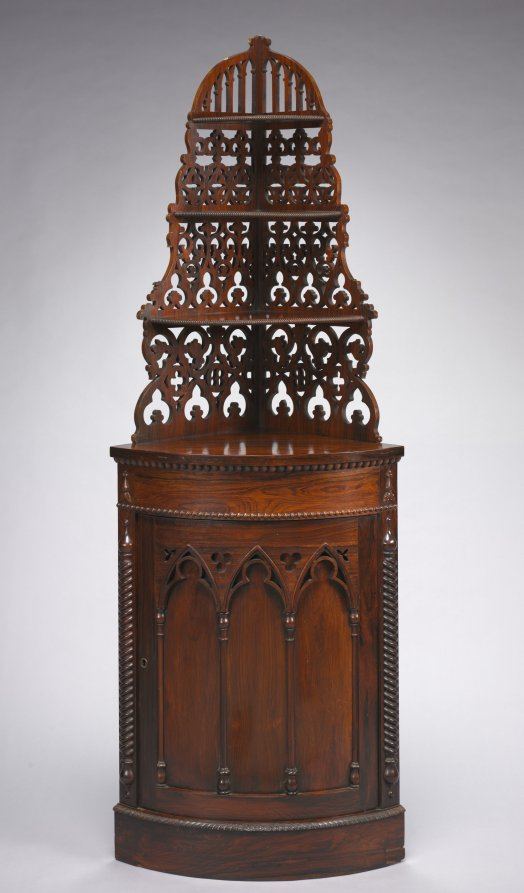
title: Corner Cabinet (Étagère)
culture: America, probably New York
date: c. 1840–50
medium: rosewood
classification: Wood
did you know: This cabinet has elements often seen in a Gothic cathedral, including the dramatic trefoil arches on the bottom.